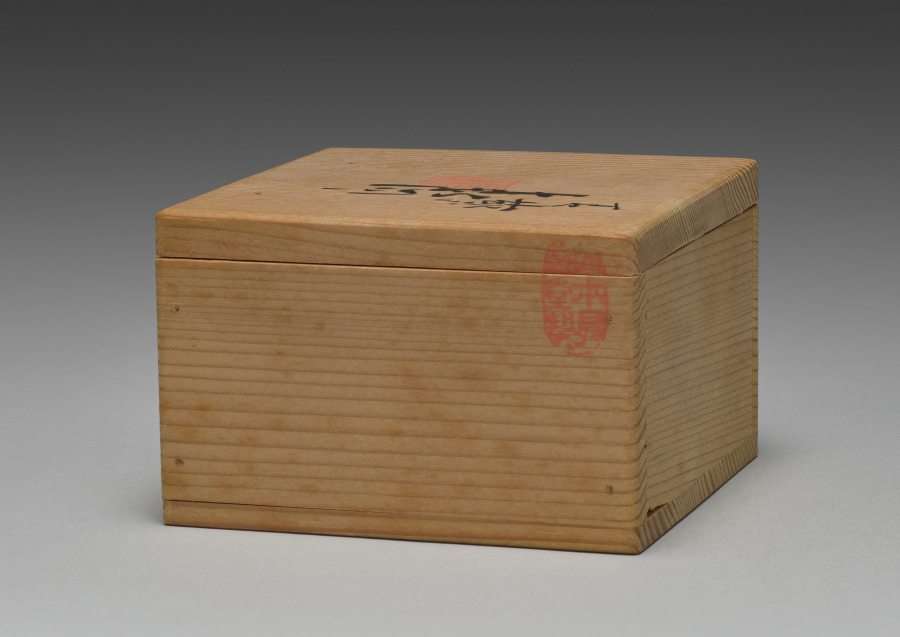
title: Sake Cup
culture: Japan, Meiji period (1868–1912)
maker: Seifū Yohei III (Japanese, 1851–1914)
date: c. 1893–1914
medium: porcelain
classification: Ceramic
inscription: 清風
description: Seifū Yohei III was the first ceramist to be designated an Imperial Household Artist, a position that came with an annuity. He was tasked with producing items need by the imperial household to decorate the Meiji Palace and to present to state guests as gifts.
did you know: There are subtle bamboo leaflike shapes on the interior of the sake cup.